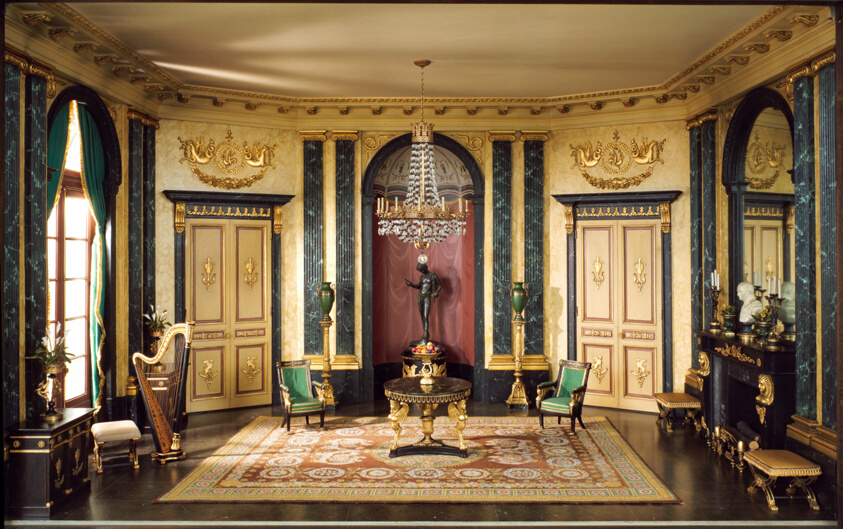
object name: Miniature room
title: E-26: French Anteroom of the Empire Period, c. 1810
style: empire, european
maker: Designed by Narcissa Niblack Thorne; American, 1882-1966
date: c. 1937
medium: Miniature room, mixed media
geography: United States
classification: miniature; thorne rooms